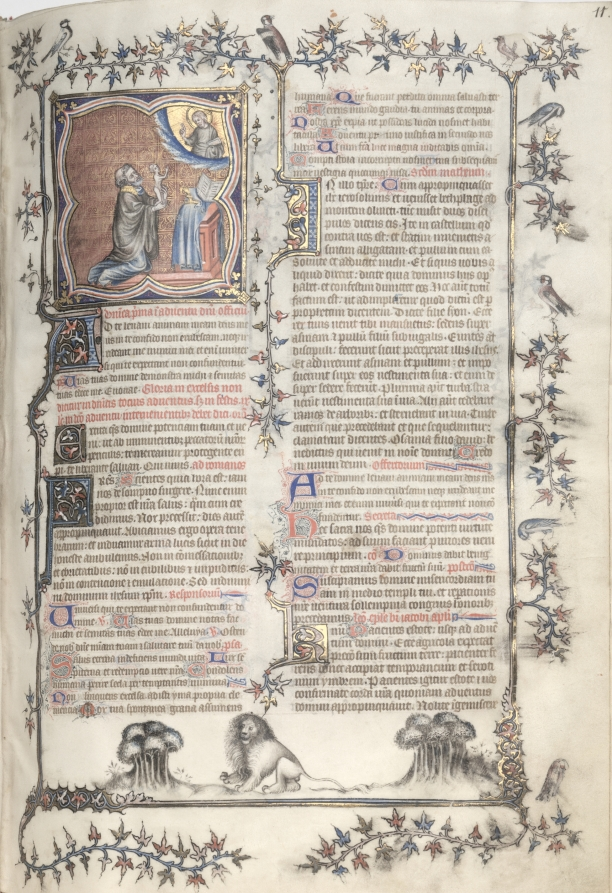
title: The Gotha Missal: Fol. 11r, Offering of the Souls; Bas-de-Page, Lions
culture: France, Paris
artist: Master of the Boqueteaux (French)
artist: and Workshop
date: c. 1375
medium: ink, tempera, and gold on vellum; blind-tooled leather binding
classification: Bound Volume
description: The style and quality of this manuscript's decoration is typical of deluxe Parisian books made for aristocratic or royal patrons. Most of the book's decoration appears to be the work of the Master of the Boqueteaux, an artist active at the court of King Charles V (died 1380). His style was apparently shared by a number of book illuminators working in and around Paris. It is very possible that the Gotha Missal belonged to Charles V, but is not provable because the manuscript has no royal portraits and lacks a colophon. Given the book's magnificent decoration, however, it would seem that it was produced for a Valois prince, if not for the king himself. The manuscript receives its name from the German dukes of Gotha, its later owners.